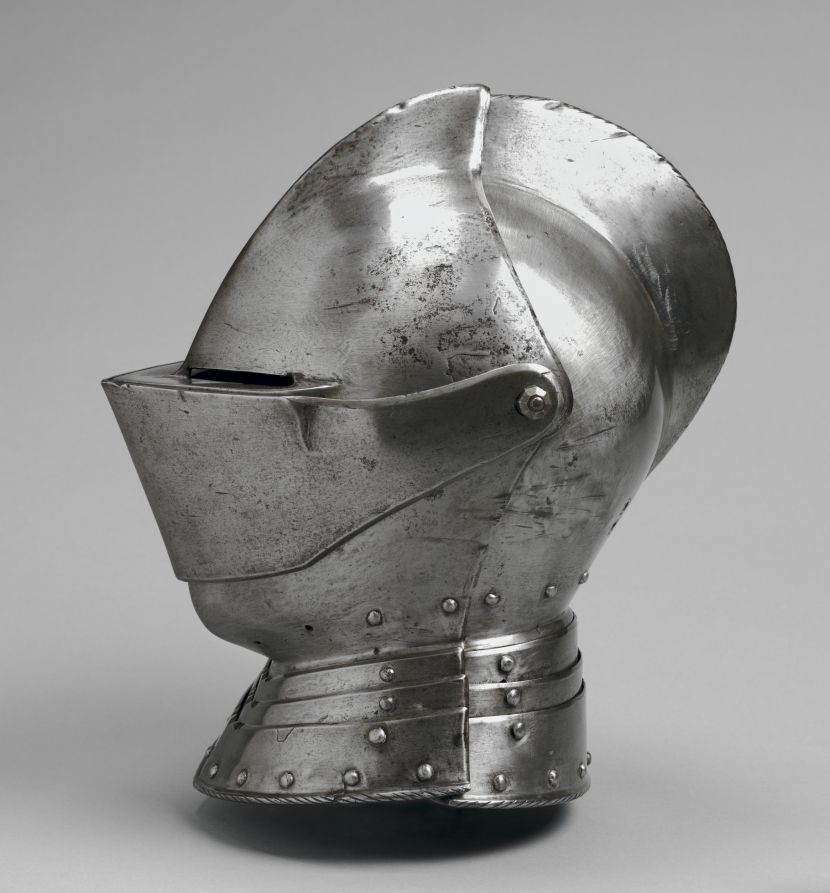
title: Helmet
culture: Germany, Saxony, 16th century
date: c. 1560–80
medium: steel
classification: Arms and Armor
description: This helmet was developed for the joust, a sporting combat of arms between two mounted contestants. This example shows the asymmetry of jousting armor. The participants rode along a wall-like barrier known as a "tilt" with their left sides facing. Consequently, armor on that side of the body tended to be thicker. The breath holes in the helmet were placed on the right side (farthest from an opponent's lance) to avoid injuries from splinters. The popularity of jousts and tournaments peaked around 1500 and required armor and other sporting equipment adapted for the endlessly varied games. By the reign of Emperor Maximilian I (1493–1519), there were at least 11 different forms of mounted jousts, exclusive of the numerous ceremonial combats on foot using such weapons as swords, halberds, pikes, and throwing axes. Each blow in the contest, especially favored in Germany, was carefully numbered and prescribed by rules.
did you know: Jousting contestants wore armor and charged at each other full speed on horseback, attempting to dismount the other with a lance. Such equipment protected contestants from injury, much like the helmet worn by football players today.